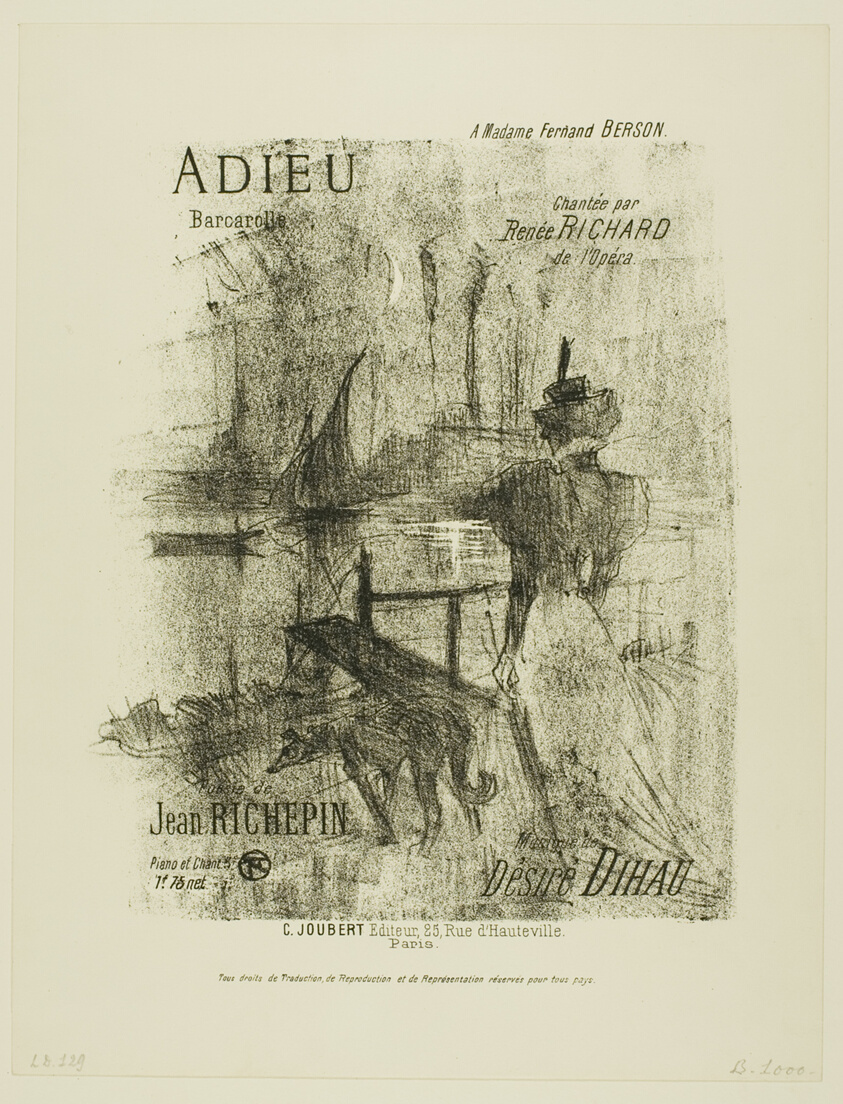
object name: Print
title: Farewell, from Mélodies de Désiré Dihau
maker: Henri de Toulouse-Lautrec (French, 1864-1901)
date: 1895, published 1935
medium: Lithograph on ivory wove paper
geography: France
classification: lithograph; print; prints and drawing